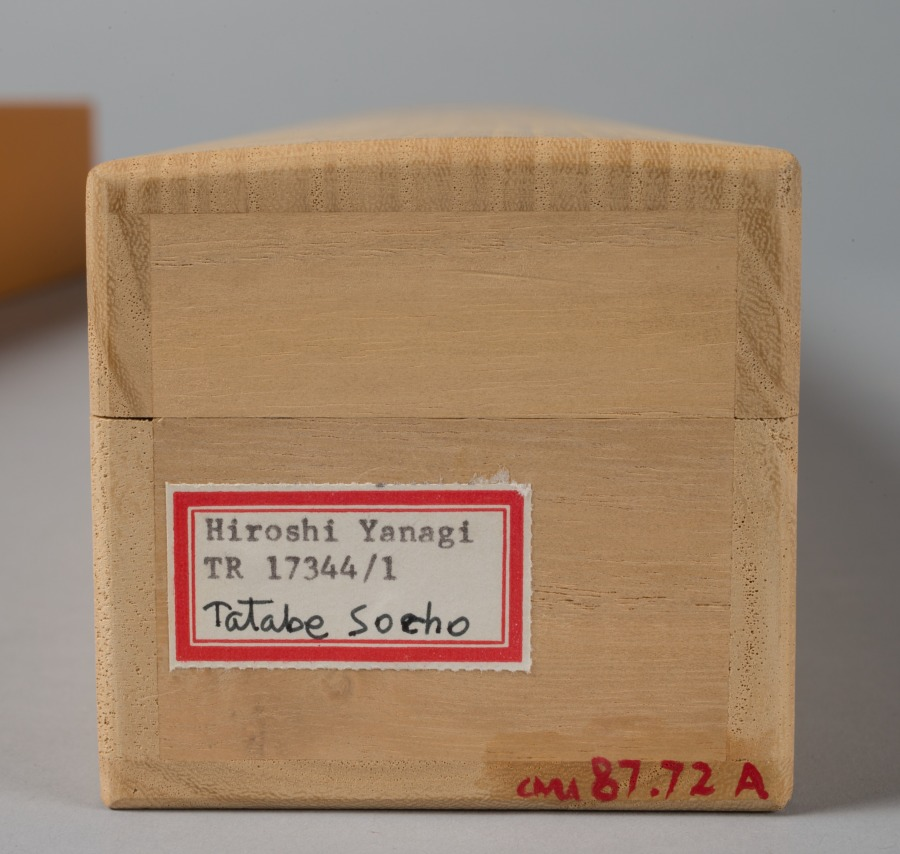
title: Genre Figures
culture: Japan, Edo period (1615–1868)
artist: Takebe Sōchō (Japanese, 1760–1814)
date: c. 1816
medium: hanging scroll; ink and color on paper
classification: Painting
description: Though rarely mentioned in official histories, Sōchō was an accomplished painter whose talent is readily apparent to the modern eye. For his compositions he chose traditional Japanese stories or everyday events. This scroll is part of a triptych of paintings converted from the folding screen format into the hanging scroll format.